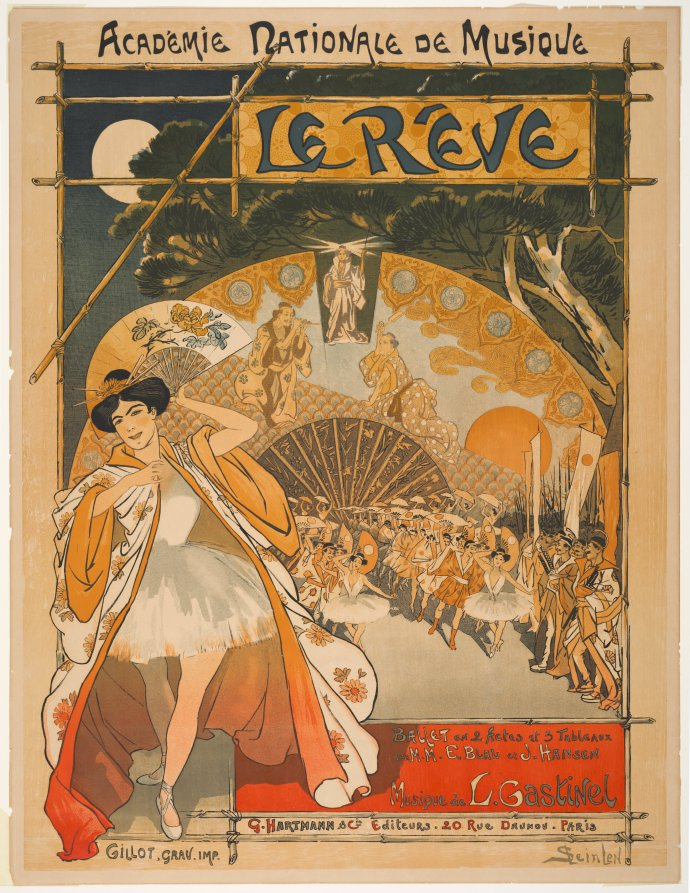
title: The Dream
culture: Switzerland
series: Academie Nationale de Musique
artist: Théophile Alexandre Steinlen (Swiss, 1859–1923)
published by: G. Hartmann & Cie Editeurs, 20 rue Daunou, Paris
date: 1891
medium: color lithograph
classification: Print